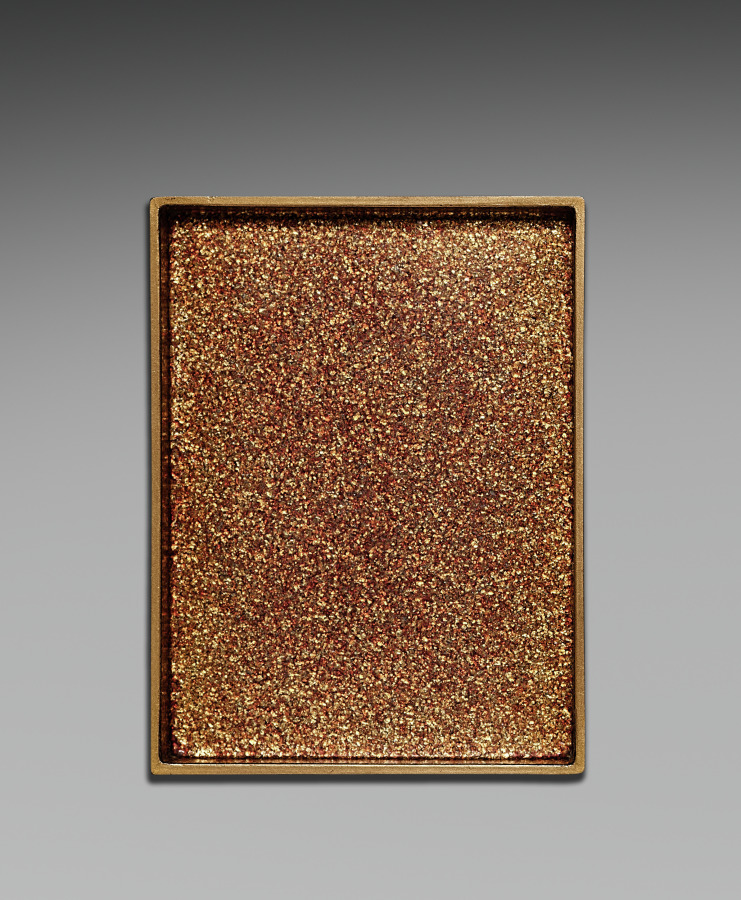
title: Nested Boxes with Chrysanthemum (inner box lid)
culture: Japan, Meiji period (1868–1912)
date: early 1900s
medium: lacquer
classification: Lacquer